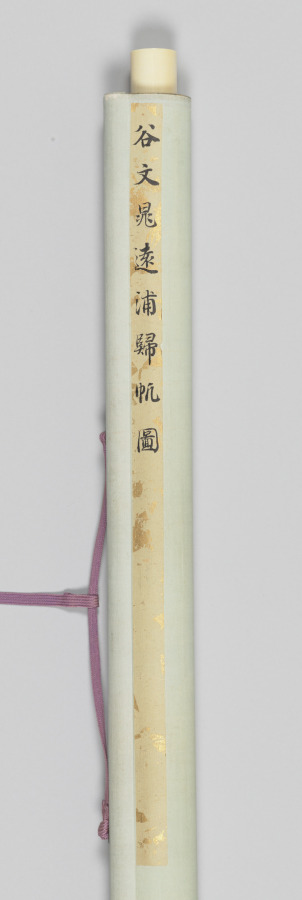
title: Returning Sails off a Distant Shores, from Eight Views of Xiao-Xiang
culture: Japan, Edo period (1615–1868)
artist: Tani Bunchō (Japanese, 1763–1841)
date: 1788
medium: album leaf remounted as a hanging scroll; ink and color on paper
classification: Painting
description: This painting was part of a set of album leaves representing the Eight Views of Xiao-Xiang, a theme originating in Chinese poetry and painting that spread to both Korea and Japan. Southern China’s Xiao-Xiang area, where the mist-covered banks of the Xiang River created a complex landscape shifting like the moods and minds of people, captured the imaginations of generations of painters and calligraphers. Inscriptions on these works suggest that they were possibly ordered by newly prominent Japanese Confucian scholars.